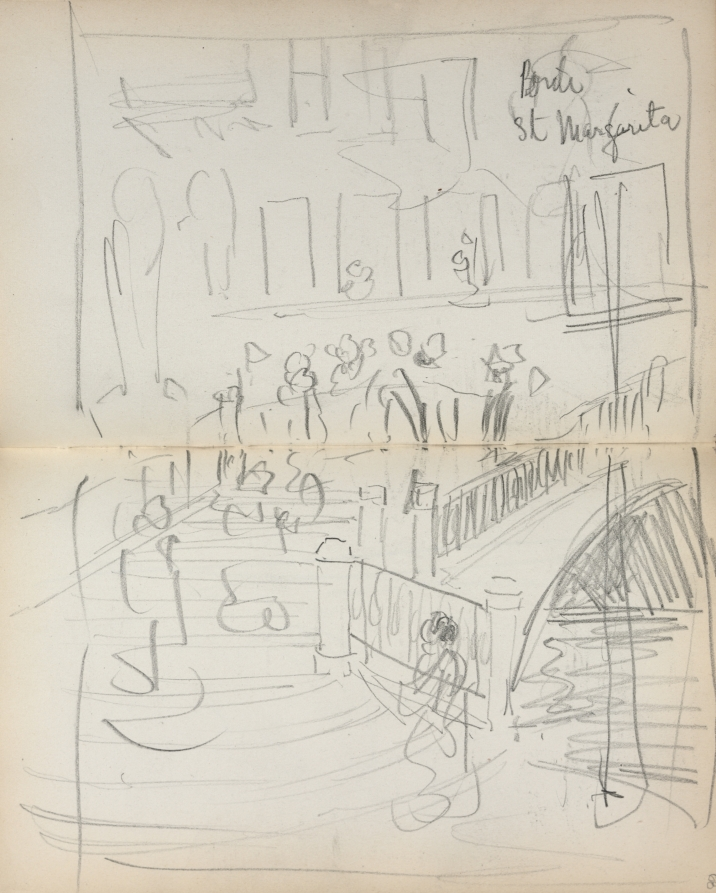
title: Italian Sketchbook: Bridge St. Margarita (page 67 & 68)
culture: America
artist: Maurice Prendergast (American, born Newfoundland [now Canada], 1858–1924)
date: 1898–1899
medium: pencil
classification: Bound Volume